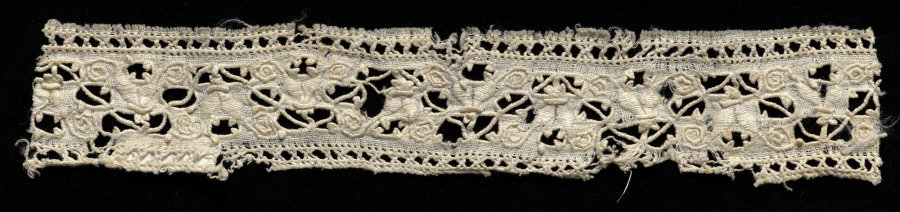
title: Lace Band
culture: Italy, 1600s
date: 1600s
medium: Linen: needle lace (cutwork)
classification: Lace